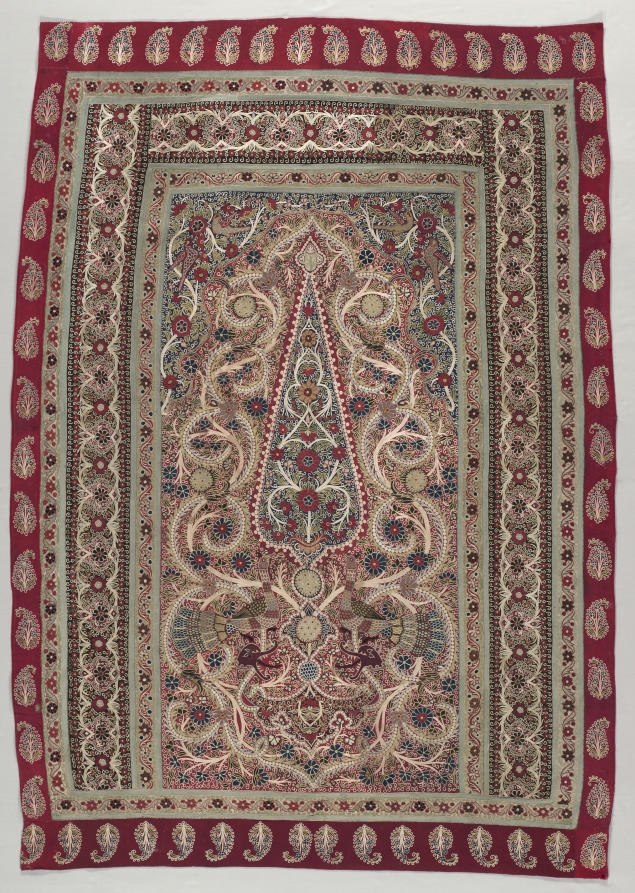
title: Tent Wall Panel(?)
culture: Iran, Rasht, Qajar period (1779-1925)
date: 1800s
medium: Wool: inlaid work; silk: embroidery, chain stitch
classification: Embroidery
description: Elaborate arched panels with multiple borders similar to this textile formed the mosaic-like interior walls of imperial tents. Here, the field is dominated by a richly decorated cypress tree above peacocks and dragon heads on an ornate foliate ground. We look upon the gardenscape through a niche (mihrab) formed by this foliage. Bright white silk “pearl” outlines, vines, and ringlets in chain-stitch embroidery enliven the pattern on contrasting colors of fulled wool. Internationally fashionable botehs, or paisleys, decorate the outer red borders.This technique has been referred to by many different names including: Rasht work, Resht work, Rashti-duzi, Rachti-douzi, embroidery applique, mosaic embroidery, piecework, patchwork, embroidery brocade, and inlaid patchwork. Many of these terms are to various degrees inaccurate descriptions of this technique. Perhaps the most practical term is Rasht work, named for the town in Iran where the technique was popularized. It begins as a ground of felted plain weave wool. Desired shapes are then punched out of the ground with a metal die and hammer. The same is done with wool of an alternating color. The edges of the different cut pieces are then embroidered together into various designs using a silk chain stitch (golab-duzi). Although this piecework technique was recorded in Iran in the 1670s, most examples survive from the 19th century, when foreigners praised them as “really [the] most beautiful embroidery.” The technique appears in furnishing fabrics, and horse covers, as well as imperial portraits, including one depicting the Qajar monarch Fath ‘Ali Shah, who ruled in 1797–1837. Sometime after leaving the workshop this panel experienced moth damage; small patches can be seen throughout.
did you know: Generally, Rasht work was made by men. Boys handled the delicate embroidering while older men designed cartoons and punched the wool designs.